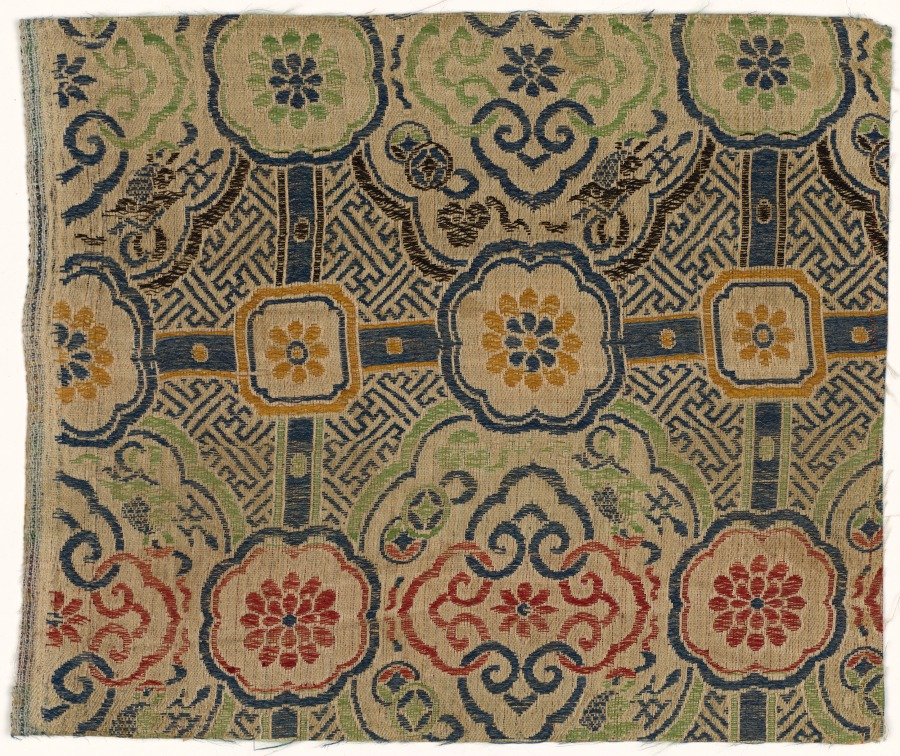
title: Textile Fragment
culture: Japan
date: 1800s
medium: silk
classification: Textile